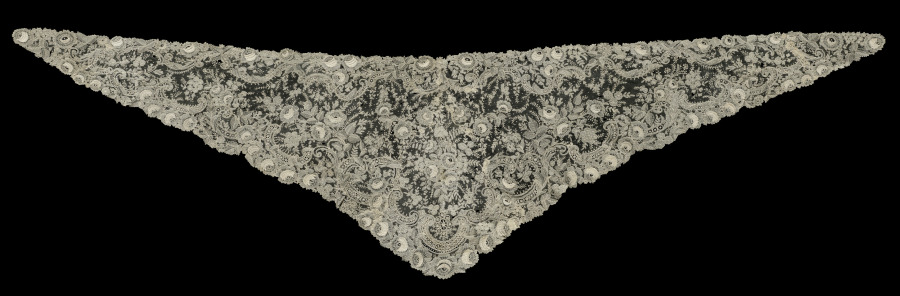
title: Lace Stole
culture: Belgium, Brussels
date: 1800s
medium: Linen: needle lace (point de gaze)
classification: Lace